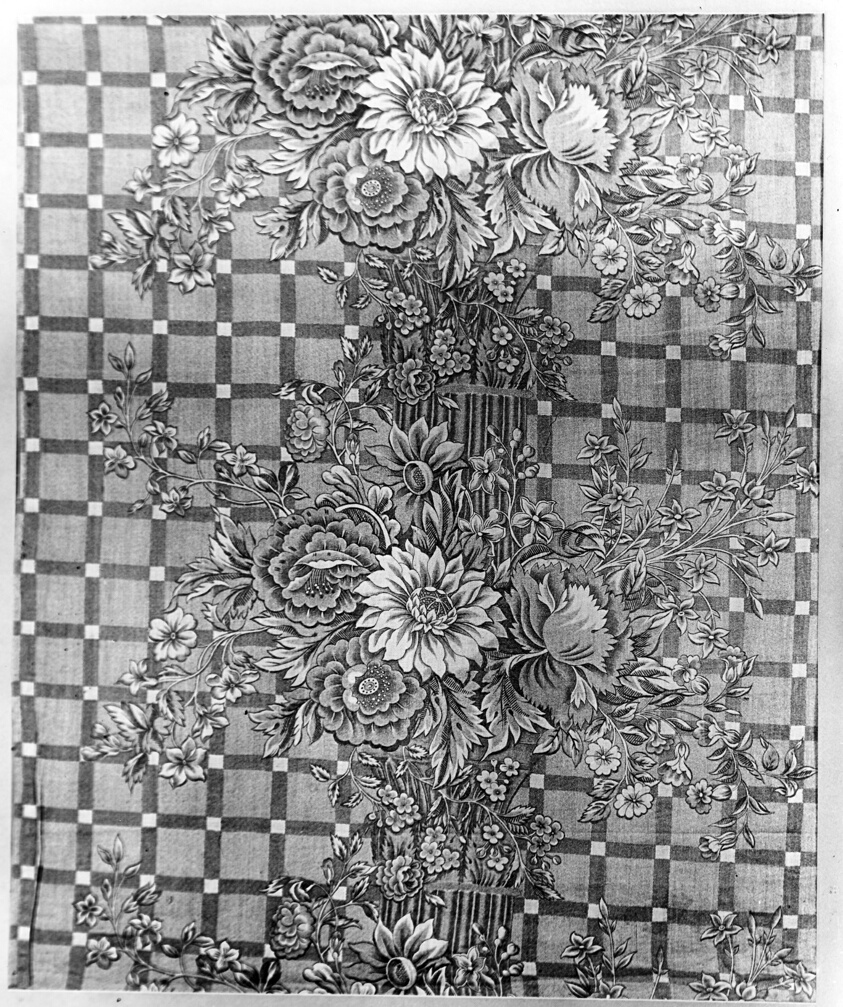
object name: Textile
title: Panel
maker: England, Lancashire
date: c. 1825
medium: Cotton, plain weave; engraved roller printed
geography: England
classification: textile; weaving - printed; weaving